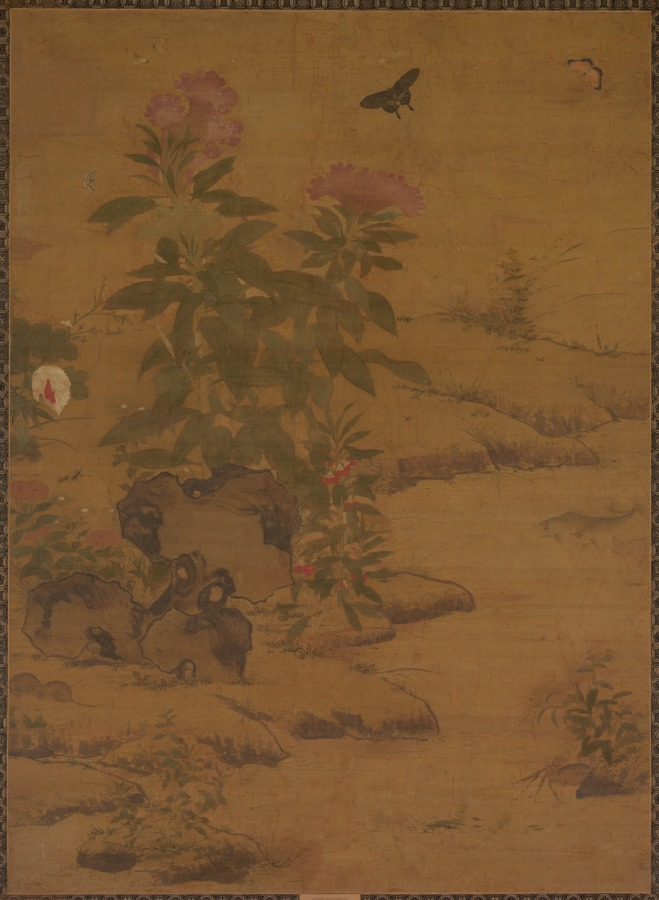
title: Plants and Insects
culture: China, Ming dynasty (1368–1644)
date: 1368–1644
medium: Ink and color on silk panel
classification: Painting